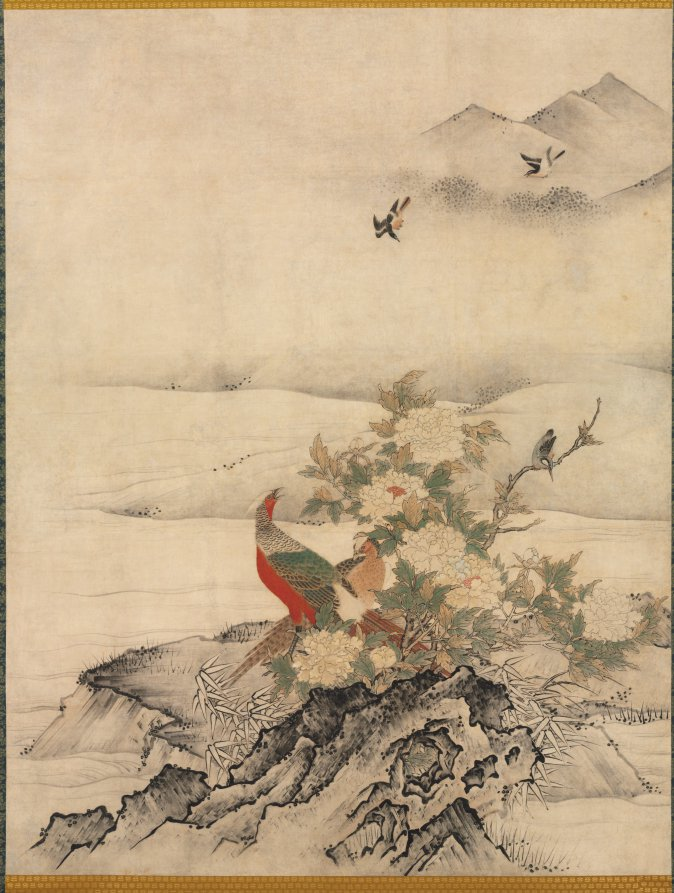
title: Flowers and Birds in a Spring Landscape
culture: Japan, Muromachi period (1392–1573)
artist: attributed to Kano Motonobu (Japanese, c. 1476–1559)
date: 1500s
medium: One of a set of sliding door panels mounted as hanging scrolls; ink and color on paper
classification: Painting